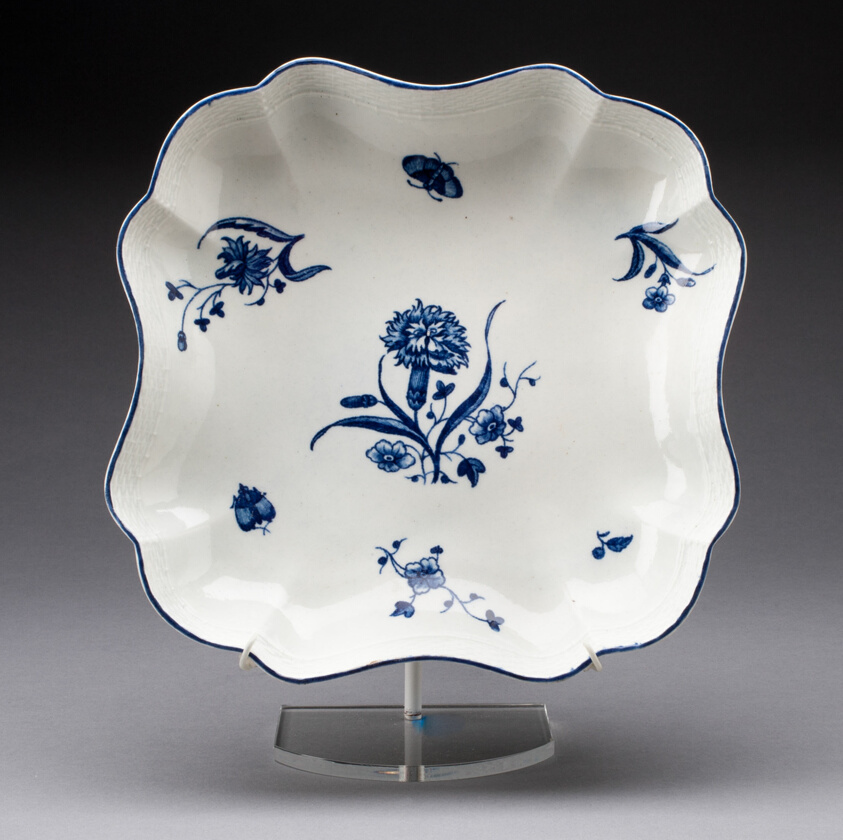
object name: Ceramics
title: Dish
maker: Worcester Porcelain Factory (Warmstry House Period, 1751–1783); Worcester, England, founded 1751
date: c. 1755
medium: Soft-paste porcelain, underglaze blue decoration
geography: Worcester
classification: dish (vessel); porcelain; european decorative arts; ceramics